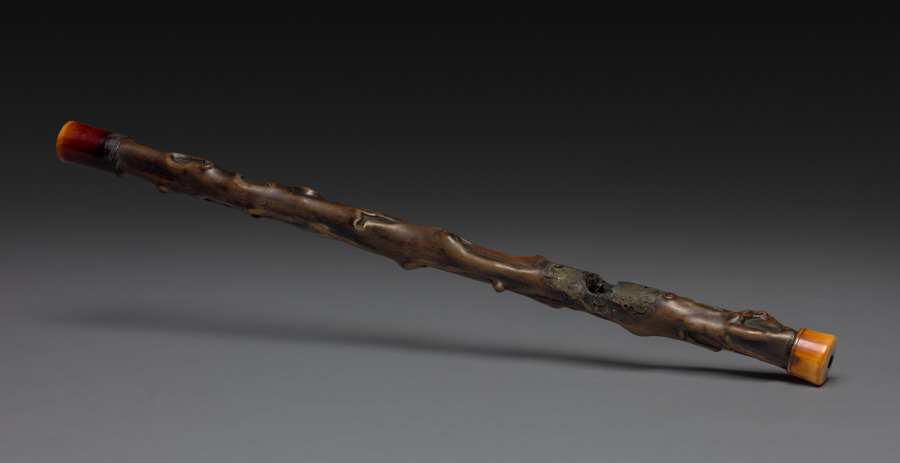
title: Opium Pipe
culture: China, Qing dynasty (1644-1911)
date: 1800s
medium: wood and ivory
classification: Miscellaneous